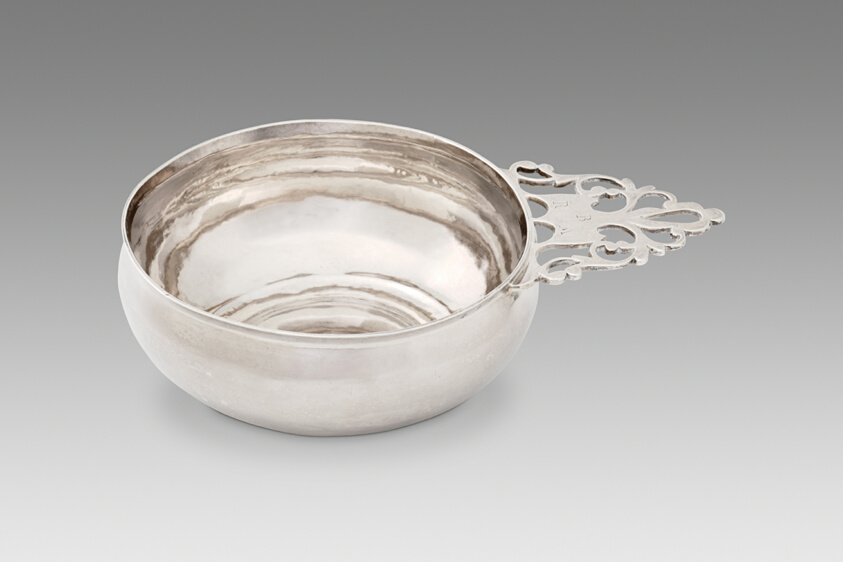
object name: Metalwork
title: Porringer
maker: Philip Syng Jr.; American, born Ireland, 1703–1789; Philadelphia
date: 1726–71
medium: Silver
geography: Philadelphia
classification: dish (vessel); silver; vessel for serving food; american decorative arts; american arts; decorative arts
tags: dining, drinking